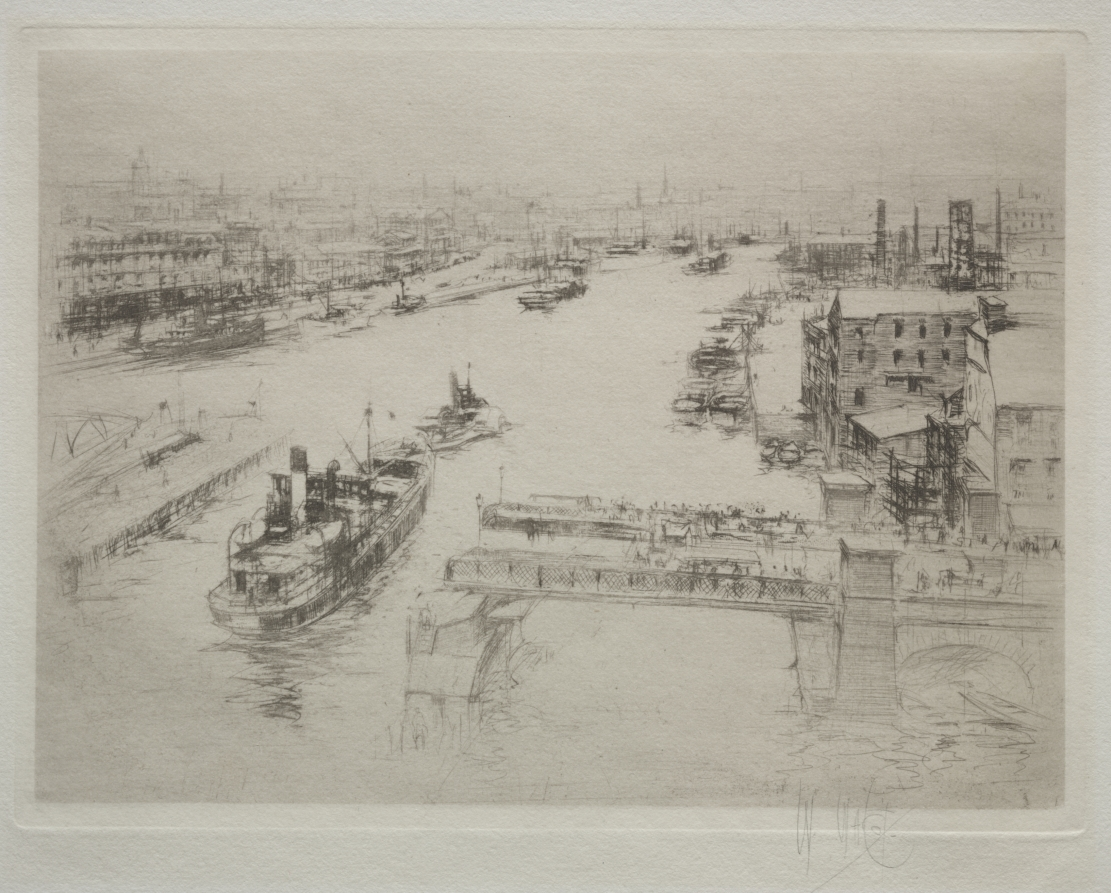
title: Arteries of Great Britain: The Tyne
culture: England, 20th century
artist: William Walcot (British, 1874–1943)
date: 1922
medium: etching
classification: Print